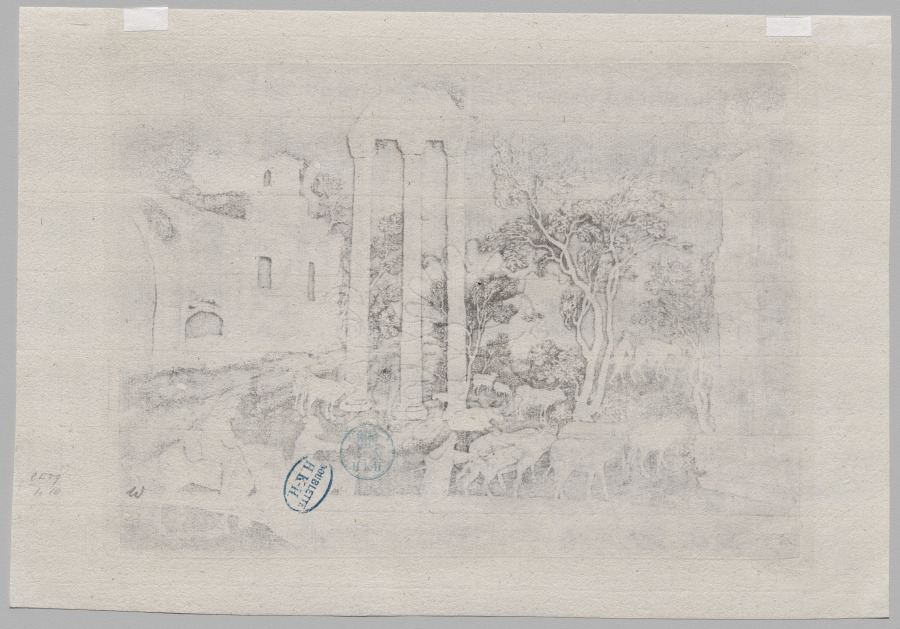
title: Pastoral Landscape with Ruins and a Ford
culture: Netherlands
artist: Gerhardt Janssen (Dutch, 1636–1725)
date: 1722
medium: etching and open-bite on laid paper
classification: Print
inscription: WATERMARK: double-headed eagle (Landscape with Ruins and a Ford); Lugt 686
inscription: Signed, lower right, in plate: JG [monogram] 1722 [in reverse]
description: Janssen’s prints depict figures, trees, and architectural details rendered light against a dark background, a reverse effect of the typical etching of the period, which reminds our modern eye of a photographic negative. The artist might have been familiar with such a reversal of light and dark through the practice of reverse glass painting, in which he was trained, and indeed, the figures glow with an idiosyncratic solarizing effect, almost as if they are part of a window. The technique was apparently invented by Janssen and is unique in early modern art.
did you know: This print was made from an iron print plate that was etched in acid in stages, creating a textured, almost corrosive effect.